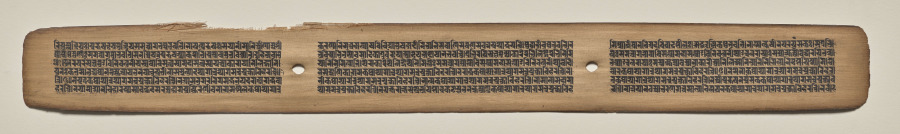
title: Text, Folio 118 (recto), from a Manuscript of the Perfection of Wisdom in Eight Thousand Lines (Ashtasahasrika Prajnaparamita-sutra)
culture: Eastern India, Bihar, Vikramashila Monastery. Painting: Nepal, Kathmandu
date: Sunday, September 14, 1119 (year 239 of the Newar Samvat in the month of Ashvina)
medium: gum tempera and ink on palm leaves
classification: Painting